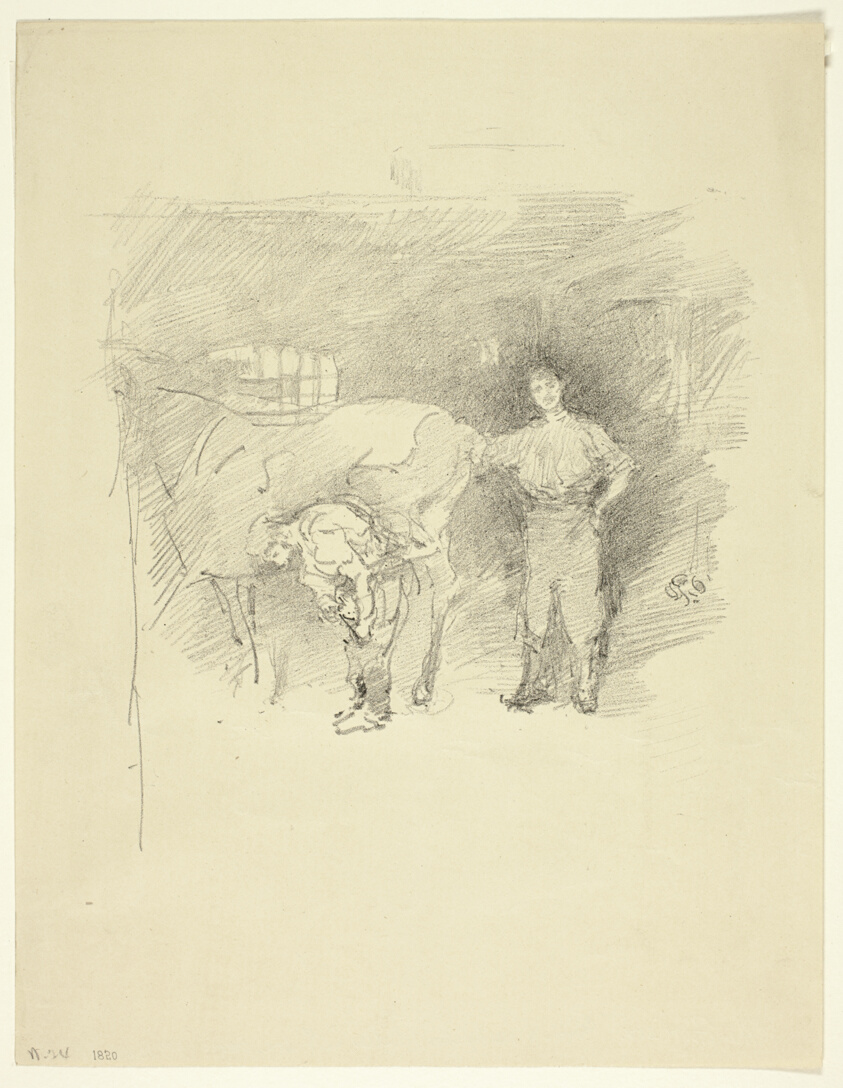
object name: Print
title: The Farriers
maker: James McNeill Whistler (American, 1834-1903)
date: 1888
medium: Transfer lithograph in black on cream wove proofing paper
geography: United States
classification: transfer lithograph; lithograph; print; prints and drawing; paper